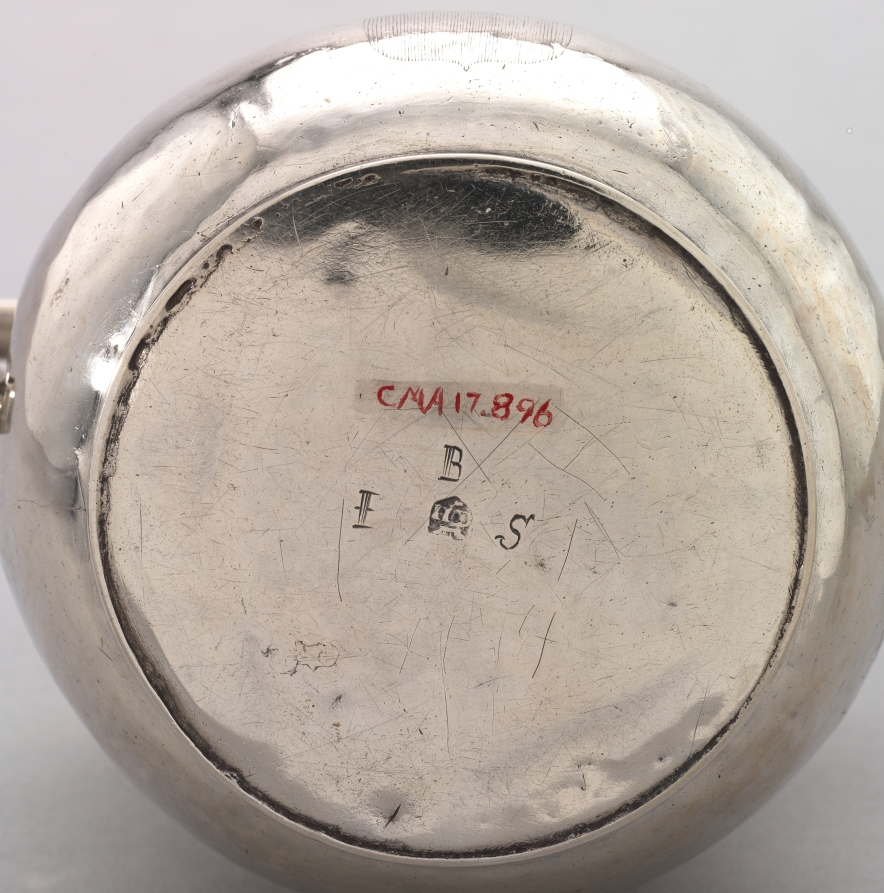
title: Two-Handled Cup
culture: America, Massachusetts, Boston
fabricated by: George Hanners (American, c. 1696–1740)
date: c. 1720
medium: silver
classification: Silver